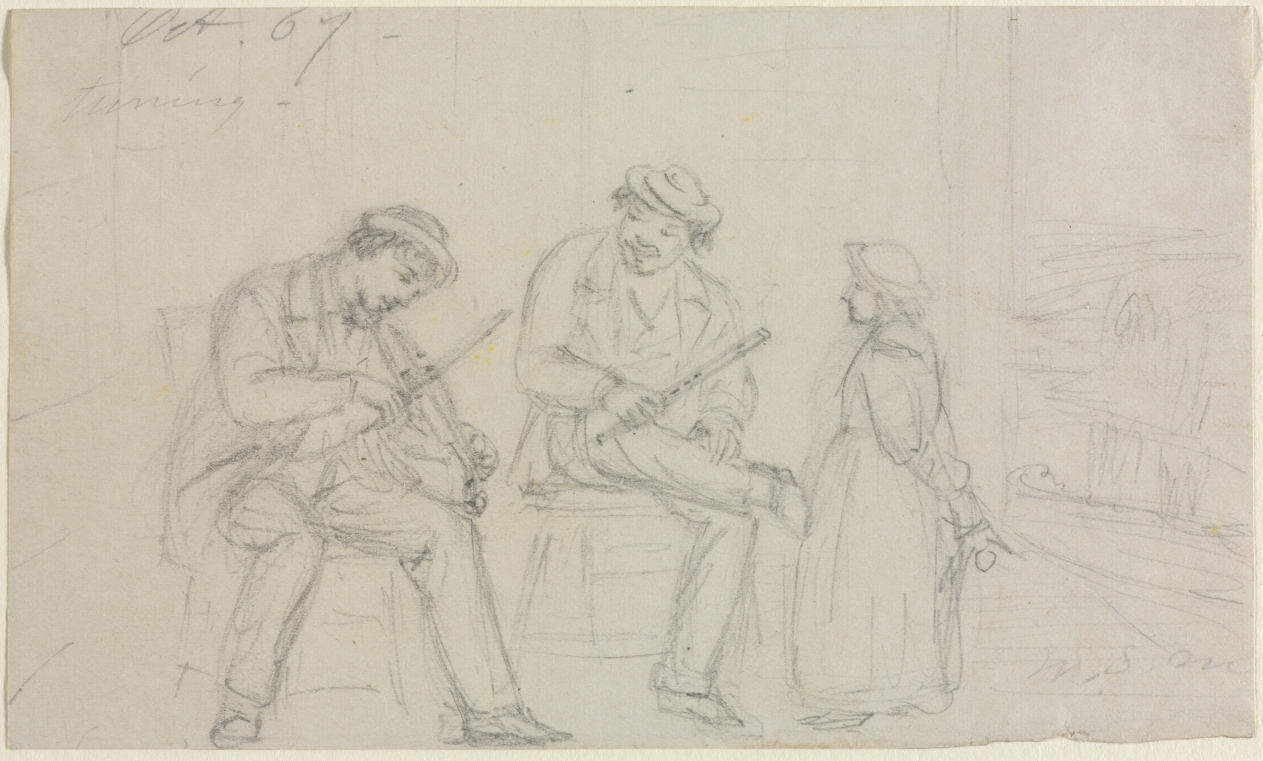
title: Tuning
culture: America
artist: William Sidney Mount (American, 1807–1868)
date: 1867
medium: graphite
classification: Drawing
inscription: signed, lower right, in graphite: W.S.M. ; by artist, upper left, in graphite: Oct. 67 - / tuning -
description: William Sidney Mount was the first major American painter of genre, or scenes of everyday life. While not directly related, the musical subject matter of two of these drawings, Tuning and Catching a Tune, brings to mind Mount's famous painting, The Power of Music, which is on view gallery 231.